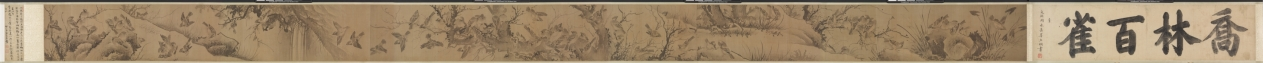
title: A Hundred Sparrows in a Lofty Grove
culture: China, Ming dynasty (1368–1644)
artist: attributed to Lin Liang (Chinese, 1416–1480)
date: 1368–1644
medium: handscroll; ink on silk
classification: Painting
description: Sparrows engaged in all kinds of activities frolic amid leafy branches, blades of grass, rocks, and a waterfall. As our eyes move over the scroll, the artist engages us in enjoying the sparrows’ carefree movements in a natural setting. The charming birds were painted from close observation in swift and fluent brushstrokes. Sparrows are a common bird and in Chinese painting they often represent the commoner in human society as opposed to the noble pheasant or peacock representative of the ruling class.